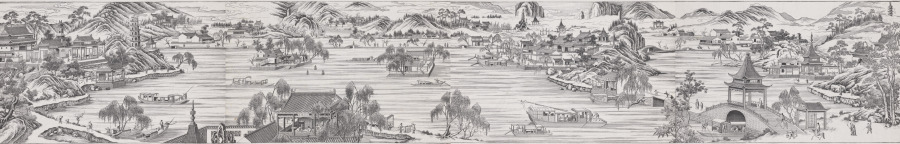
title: Westlake Panorama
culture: China, Qing dynasty (1644–1911), Qianlong reign (1736–95)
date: mid-1700s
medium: woodblock print, ink on paper; printed with three woodblocks in shades of black on four sheets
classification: Print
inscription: 信德號 姑蘇管瑞玉頂細西洋畫發客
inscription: The 10 scenes on the four prints are identified by their titles: Print one: 1. Remnant Snow on Broken Bridge (Duanqiao canxue, 斷橋殘雪), 2. Lotus Breeze at Qu Winery (Quyuan fenghe, 曲院風河 [sic]). Print two: 3. Autumn Moon over Placid Lake (Pinghu qiuyue, 平湖秋月), 4. Twin Peaks Piercing the Clouds (Liangfeng chayun, 兩峰插云), 5. Spring Dawn at Su Dike (Sudi chunxiao, 蘇 堤春曉), 11. The emperor’s temporary palace (xinggong, 行宮). Print three: 6. Listening to the Orioles by the Willow Ripples (Liulang wenying, 柳浪 聞鶯), 7. Three Stupas and the Reflecting Moon (Santan yinyue, 三潭印月). Print four: 8. Watching Fish at Flower Cove (Huagang guanyu, 花港觀魚), 9. Sunset at Leifeng Pagoda (Leifeng xizhao, 雷峰夕照). 10. Evening Bell from Nanping Hill (Nanping wanzhong, 南屏晚鍾.) In print two, 11. the emperor’s temporary palace (xinggong 行宮) is also identified.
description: Revived by the southern imperial inspection tours, West Lake imagery became a popular subject during the early Qing dynasty. This panorama is composed of four prints, showing the Ten Scenes of the West Lake in Hangzhou along with other sights. The vanishing point perspective and the hatching lines that depict shading, water, or sky derive from European copperplate prints, introduced by missionaries to China, and were celebrated novelties in 18th-century Suzhou prints. These prints also reached Europe to furnish 18th-century palace interiors.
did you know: Woodblock printing in color reached a height in China in the 1600s to 1700s. The prints were executed by means of sets of separate blocks, each carved to print a different color.